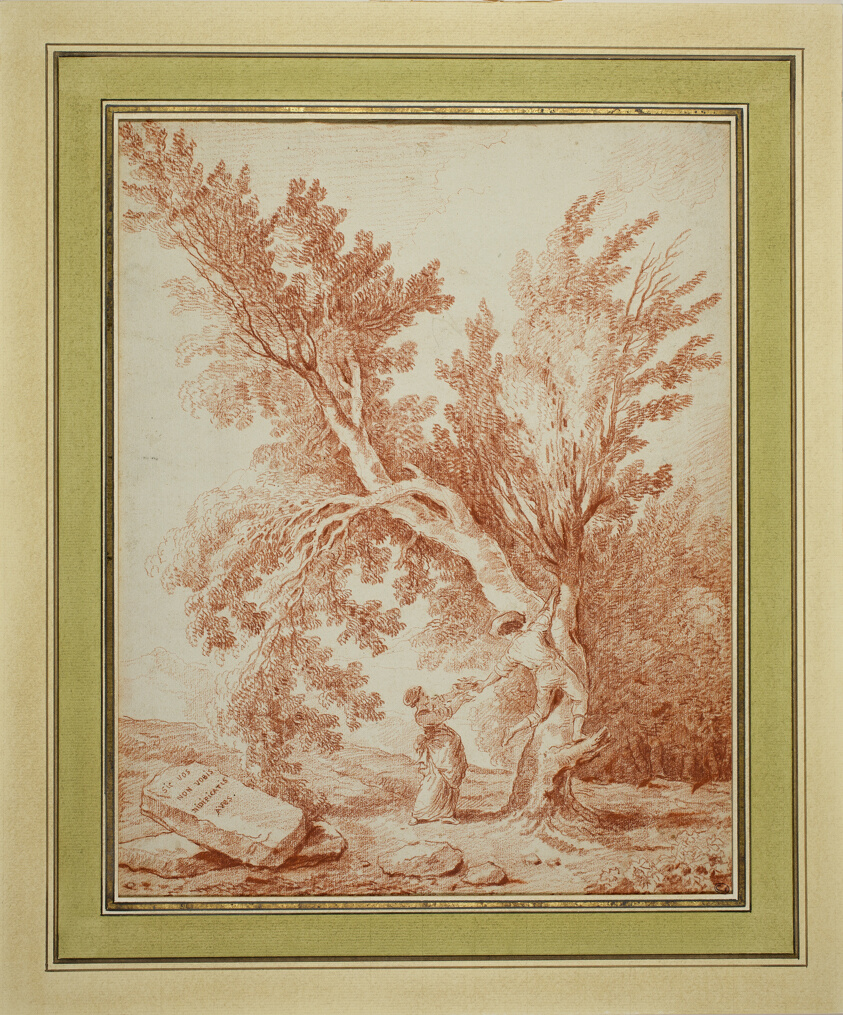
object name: Drawing and Watercolor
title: The Nest Robber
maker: Hubert Robert (French, 1733-1808)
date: 1780s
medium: Red chalk, with touches of orange chalk, with touches of pen and brown ink, on cream laid paper, incised with a compass, laid down on blue wove board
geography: France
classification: drawings (visual works); prints and drawing